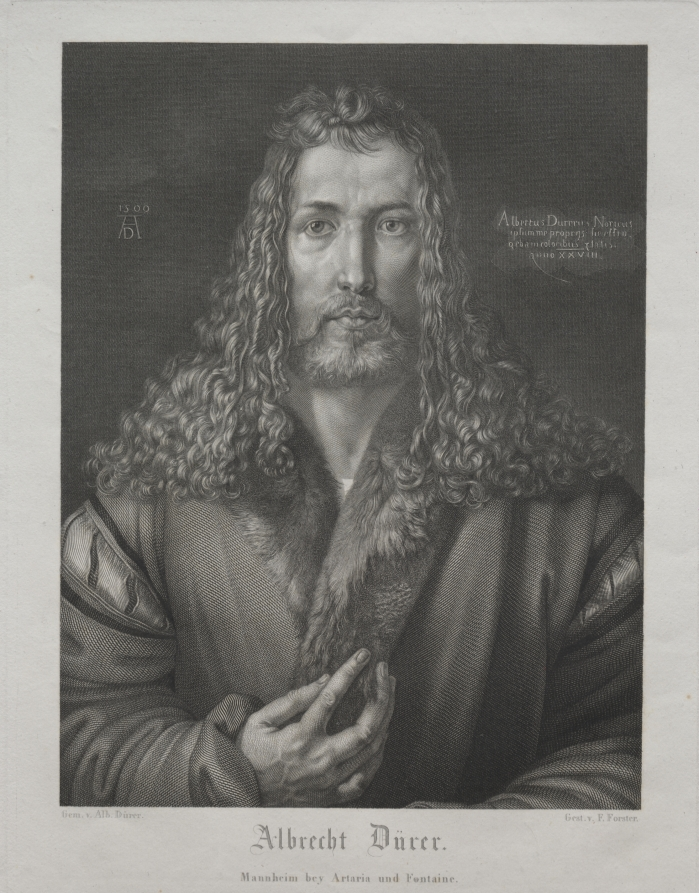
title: Albrecht Dürer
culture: France, 19th century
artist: François Forster (French, 1790–1872)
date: c. 1822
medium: engraving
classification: Print